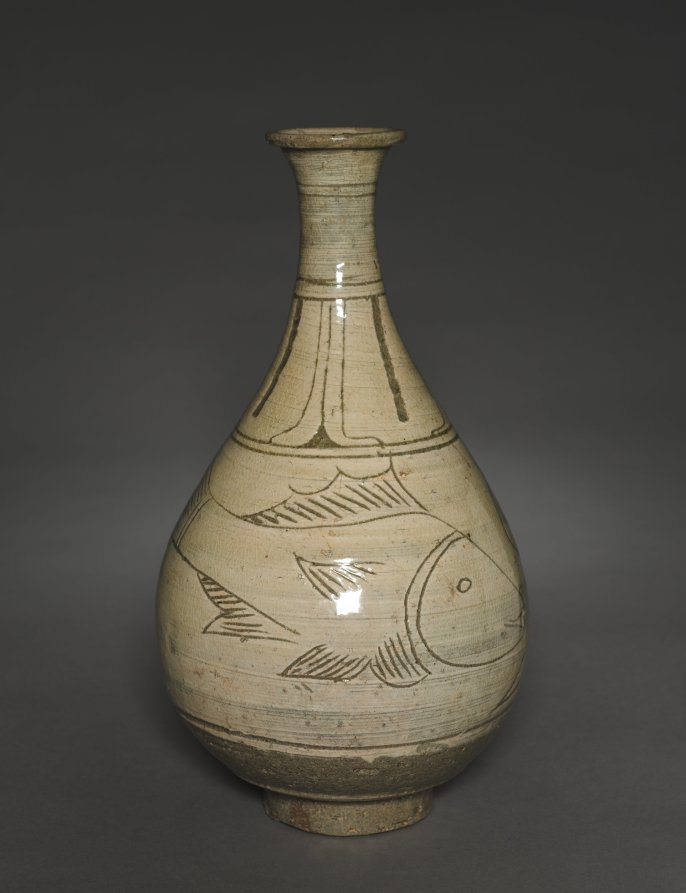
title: Bottle with Incised and Sgraffito Fish Design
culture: Korea, Joseon dynasty (1392–1910)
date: 1400s–1500s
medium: stoneware with incised design (Buncheong ware)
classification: Ceramic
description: This whimsical bottle is classified as Buncheong 분청 (literally, powdered green). Flourishing during the 1400s–1500s, Buncheong indicates pottery with iron-rich clay decorated with white slip. After firing, the color of the clay body usually became greenish-gray due to its high iron content. Korean artists tried to emulate the white porcelain wares of the Chinese Ming period, although the result was not the same. On the surface coated with white slip, the image of a smiling fish is carved in bold lines, a technique distinctive to Jeolla province, a southwest region of the Korean peninsula.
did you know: The fish depicted here seems to be a small yellow croaker, abundant off the southwest coast of the Korean peninsula.